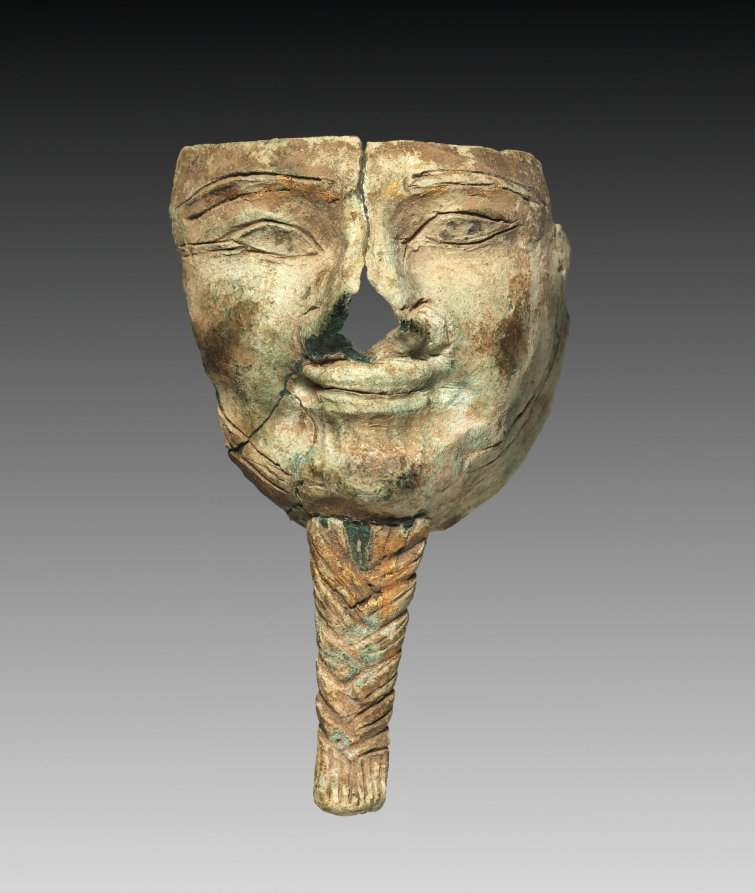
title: Mask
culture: Egypt, probably Greco-Roman period (332 BCE–395 CE)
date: 332 BCE–395 CE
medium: wax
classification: Funerary Equipment